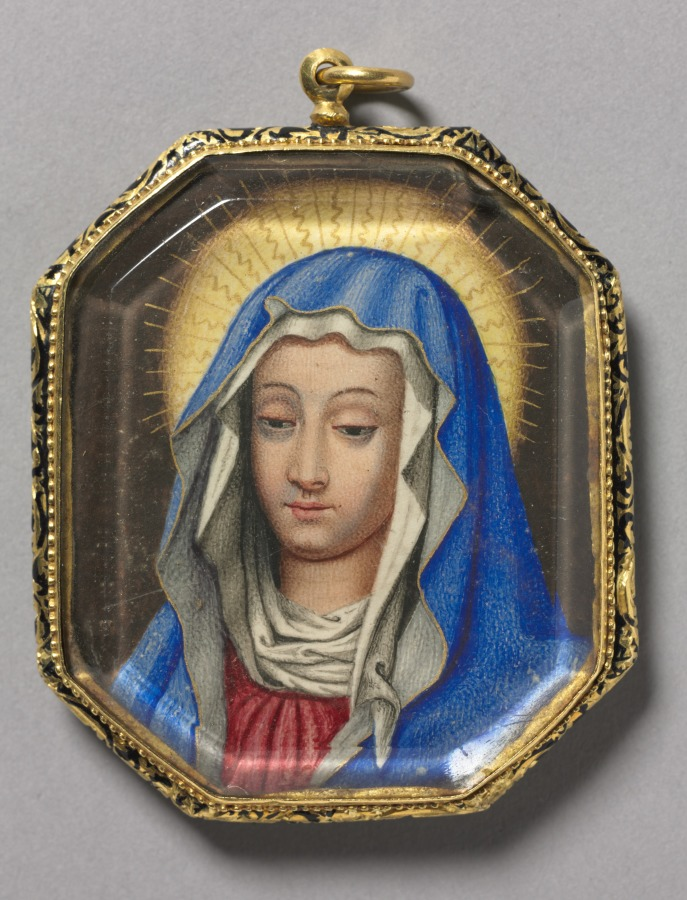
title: The Virgin (recto) and St. Francis with Christ Child (verso)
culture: Spain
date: c. 1660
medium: watercolor on vellum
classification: Portrait Miniature